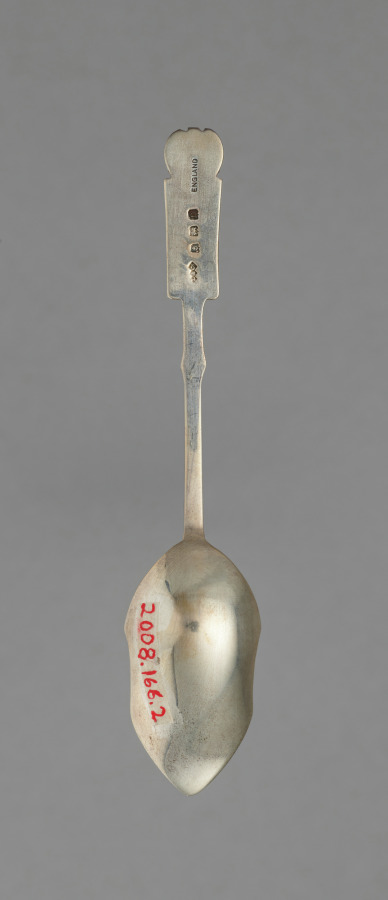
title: Set of six Spoons in Original Box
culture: England, London, 19th century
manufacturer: Liberty and Company (British)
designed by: attributed to Archibald Knox (British, 1864–1933)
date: c. 1895–1910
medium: Silver, enamel decoration and leather box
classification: Silver